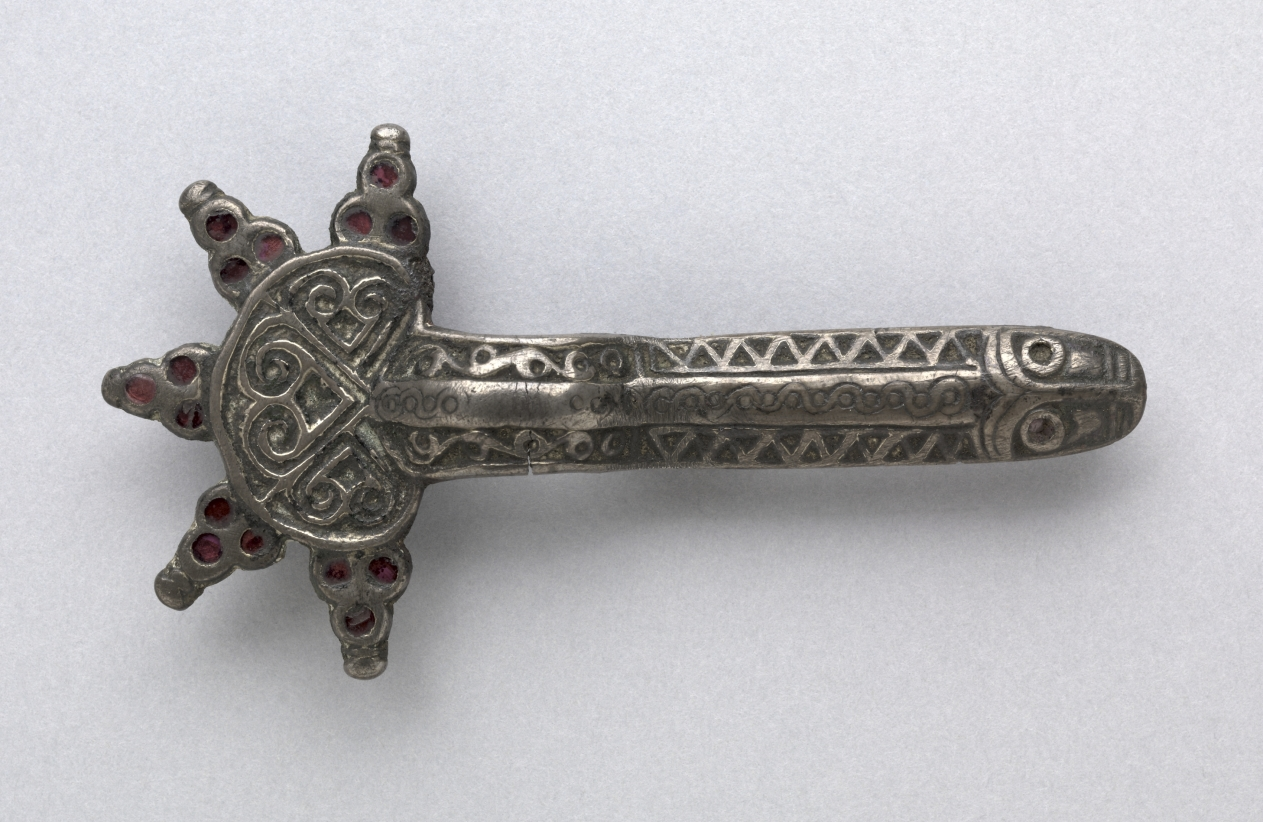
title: Fibula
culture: Frankish, Migration period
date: 500s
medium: silver with garnets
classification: Jewelry